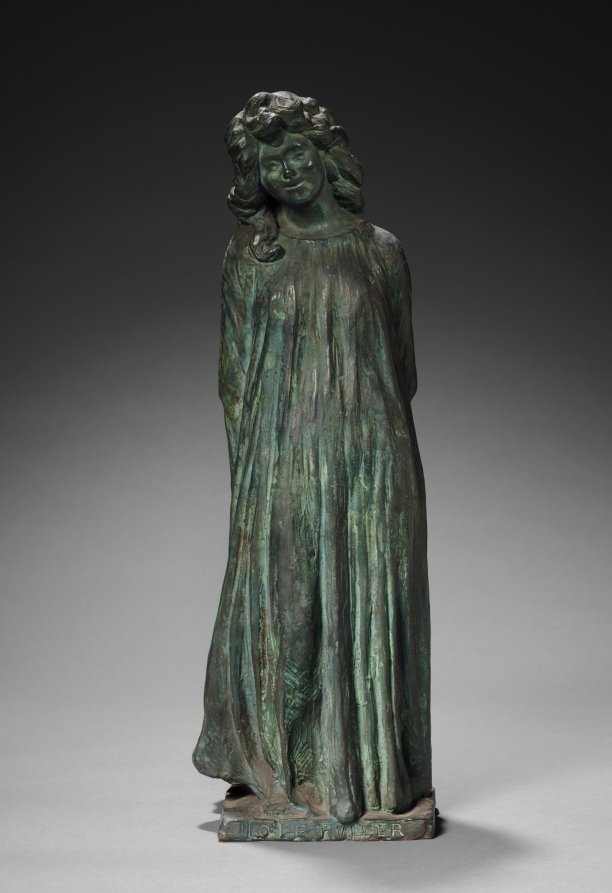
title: Loïe Fuller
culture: France, 19th-20th century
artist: Pierre Roche (French, 1855–1922)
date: c. 1900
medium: bronze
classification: Sculpture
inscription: Inscribed on the face of the base: "Loïe Fuller" and at the right, signature of the artist